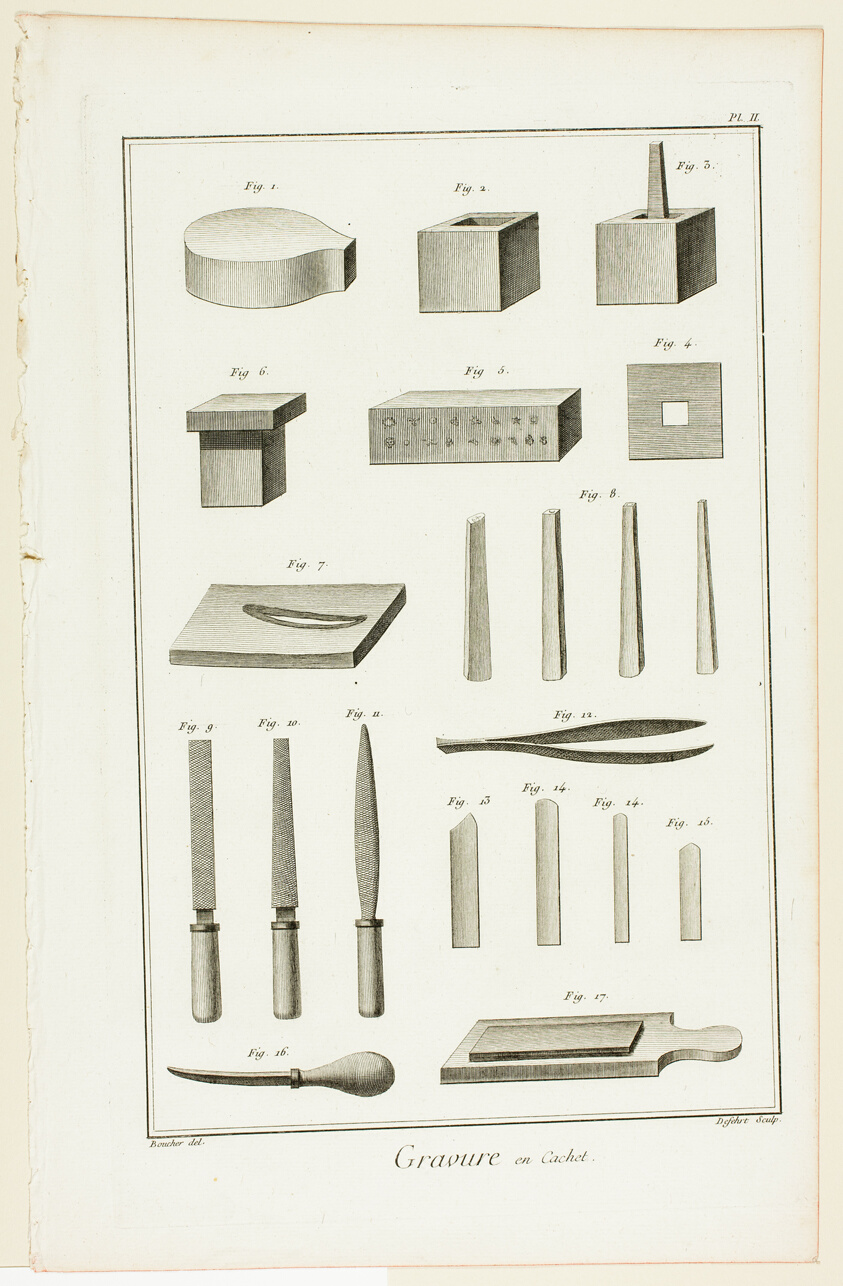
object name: Print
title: Seal Engraving, from Encyclopédie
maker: A. J. Defehrt (French, active 18th century); after Antoine-Gaspard Boucher d'Argis (French, 1708-1791); published by André le Breton (French, 1708-1779), Michel-Antoine David (French, c. 1707-1769), Laurent Durand (French, 1712-1763), and Antoine-Claude Briasson (French, 1700-1775)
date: 1762/77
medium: Engraving on cream laid paper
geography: France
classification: etching; print; prints and drawing